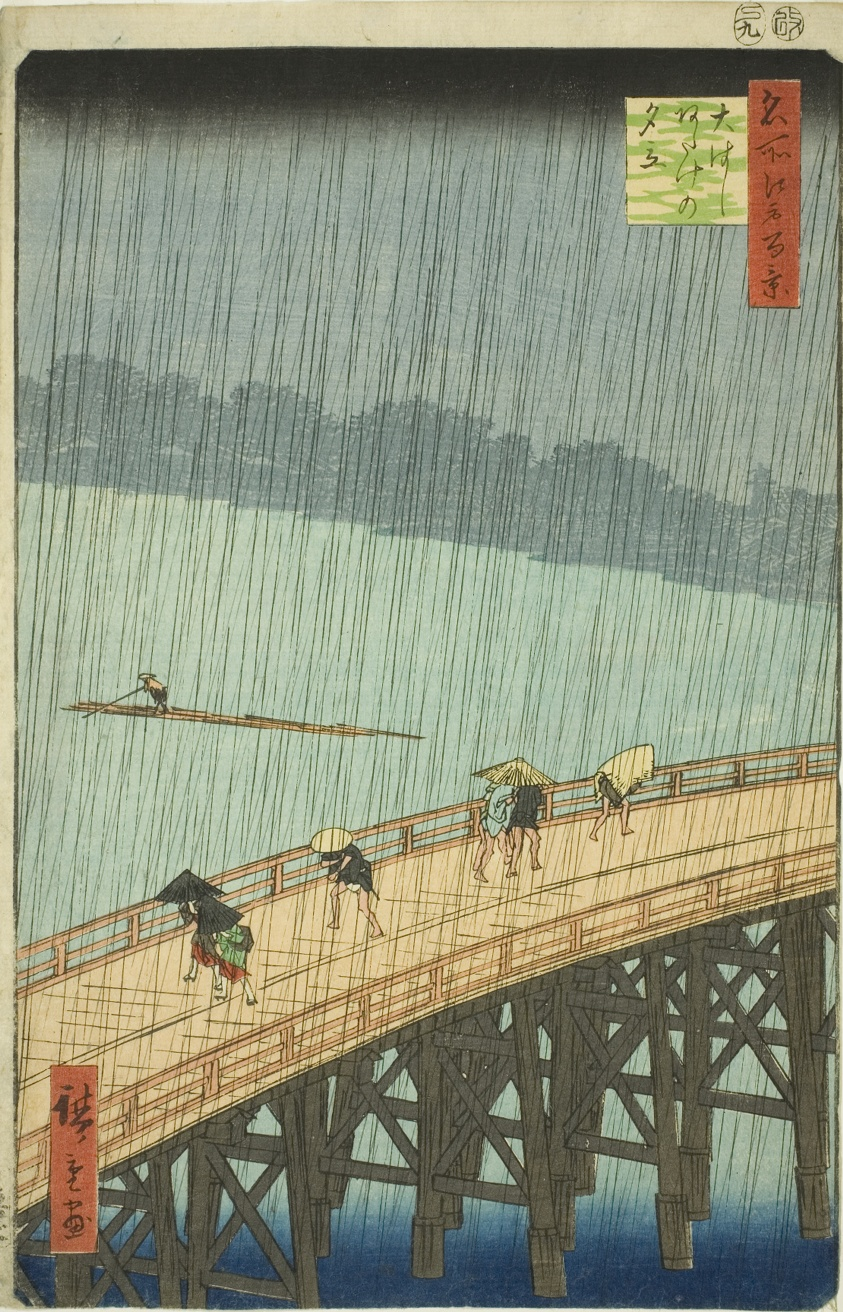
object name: Print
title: Sudden Shower over Shin Ohashi Bridge and Atake (Ohashi Atake no yudachi), from the series "One Hundred Famous Views of Edo (Meisho Edo hyakkei)"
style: Japanese (culture or style)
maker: Utagawa Hiroshige 歌川 広重; Japanese, 1797-1858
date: 1857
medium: Color woodblock print; oban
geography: Japan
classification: woodblock print; print; asian art